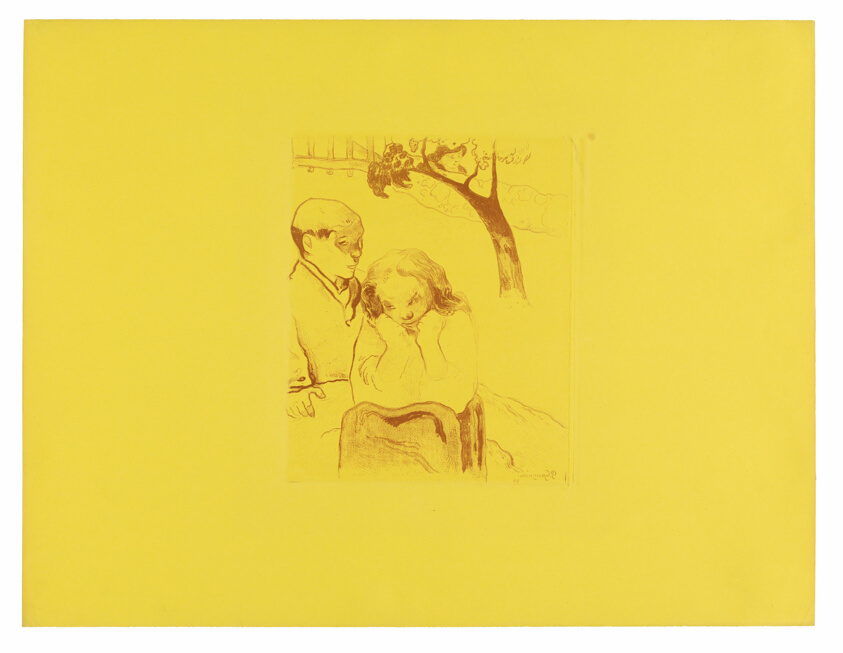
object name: Print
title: Human Miseries, from the Volpini Suite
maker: Paul Gauguin (French, 1848-1903)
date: 1889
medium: Zincograph in reddish-brown on chrome yellow wove paper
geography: France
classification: zincograph; lithograph; print; prints and drawing